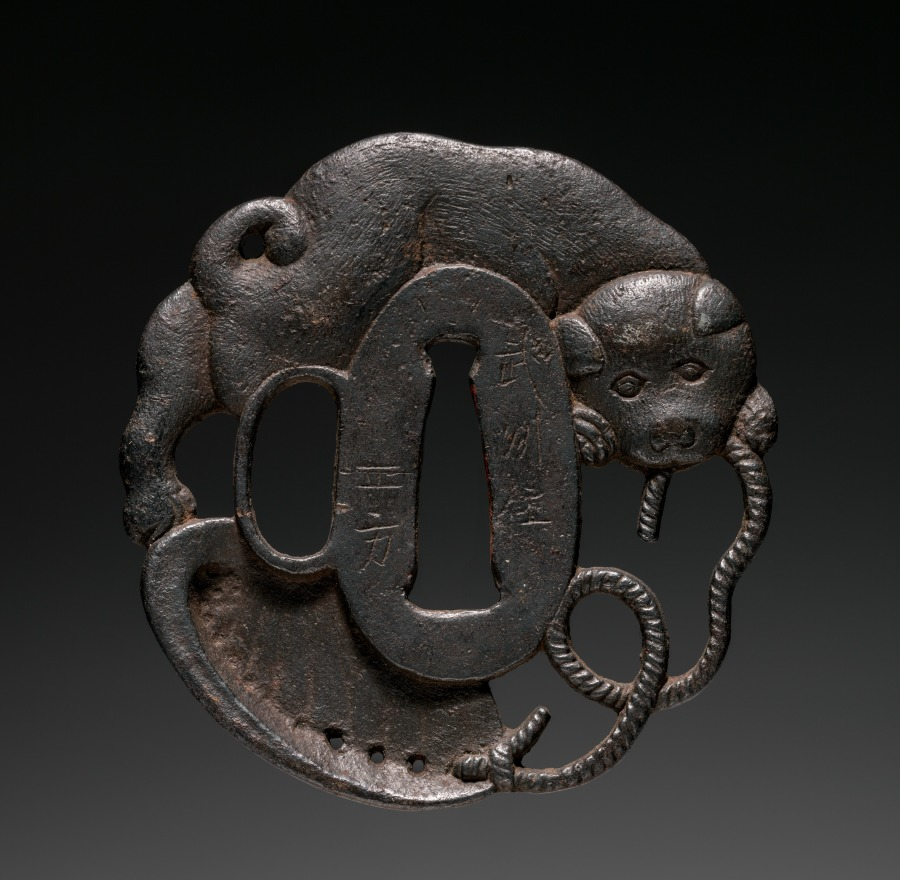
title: Sword Guard (Tsuba) with Puppy Playing with Shell on Cord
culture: Japan, possibly Edo period (1615-1868)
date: c. 1615–1868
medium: iron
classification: Arms and Armor